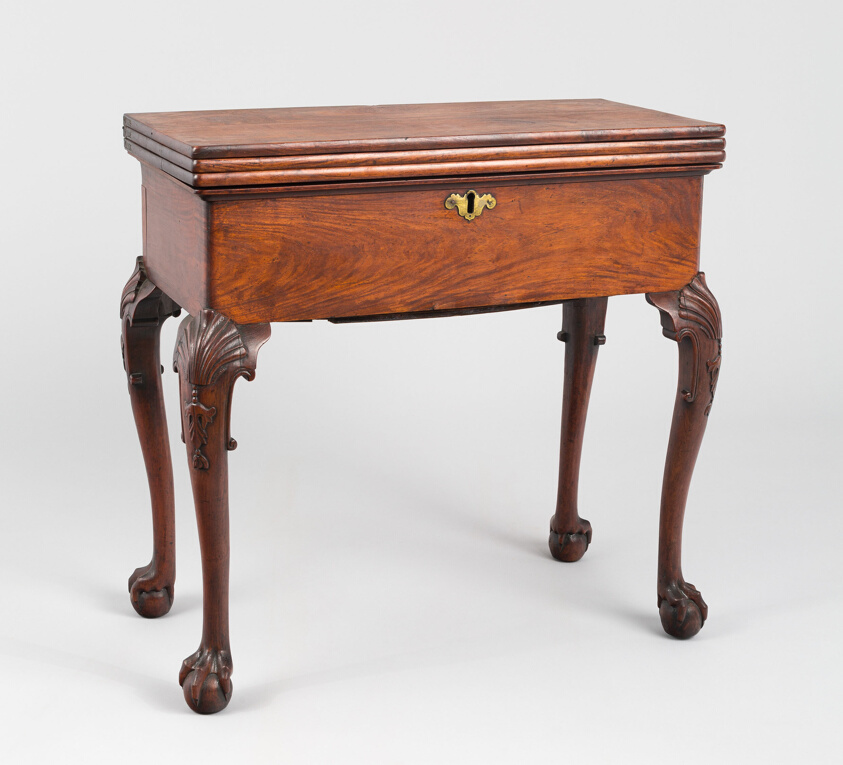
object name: Furniture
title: Harlequin Table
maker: China, for Export Market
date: c. 1775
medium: Rosewood or padouk; brass mounts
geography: China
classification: table; furniture; european decorative arts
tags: furniture